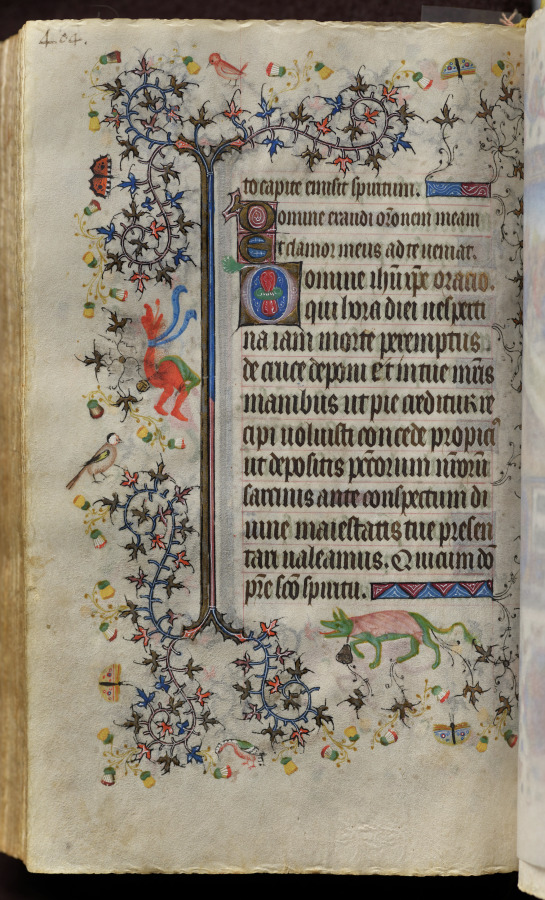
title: Hours of Charles the Noble, King of Navarre (1361-1425): fol. 196v, Text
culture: France, Paris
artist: Master of the Brussels Initials and Associates (French)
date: c. 1405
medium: ink, tempera, and gold on vellum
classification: Bound Volume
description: This precious volume was obviously highly prized by its owner, the French-born King of Navarre, who had his coat of arms painted on no less than twenty folios. Rather than directly commissioning this manuscript from a specific workshop, it seems that Charles the Noble acquired his book of hours -- perhaps ready-made for the luxury market -- while on a trip to Paris in 1404-05. A collaborative effort, six painting styles are evidenced within the pages of this codex, those of two Italians, two Frenchmen, and two Netherlanders. The painter who was responsible for the planning and decoration of the book, and who produced seventeen of the large miniatures, was a Bolognese artist known as the Master of the Brussels Initials. His principal assistant, responsible for most of the borders, was a Florentine who signed his name "Zecho" da Firenze on folio 208 verso.